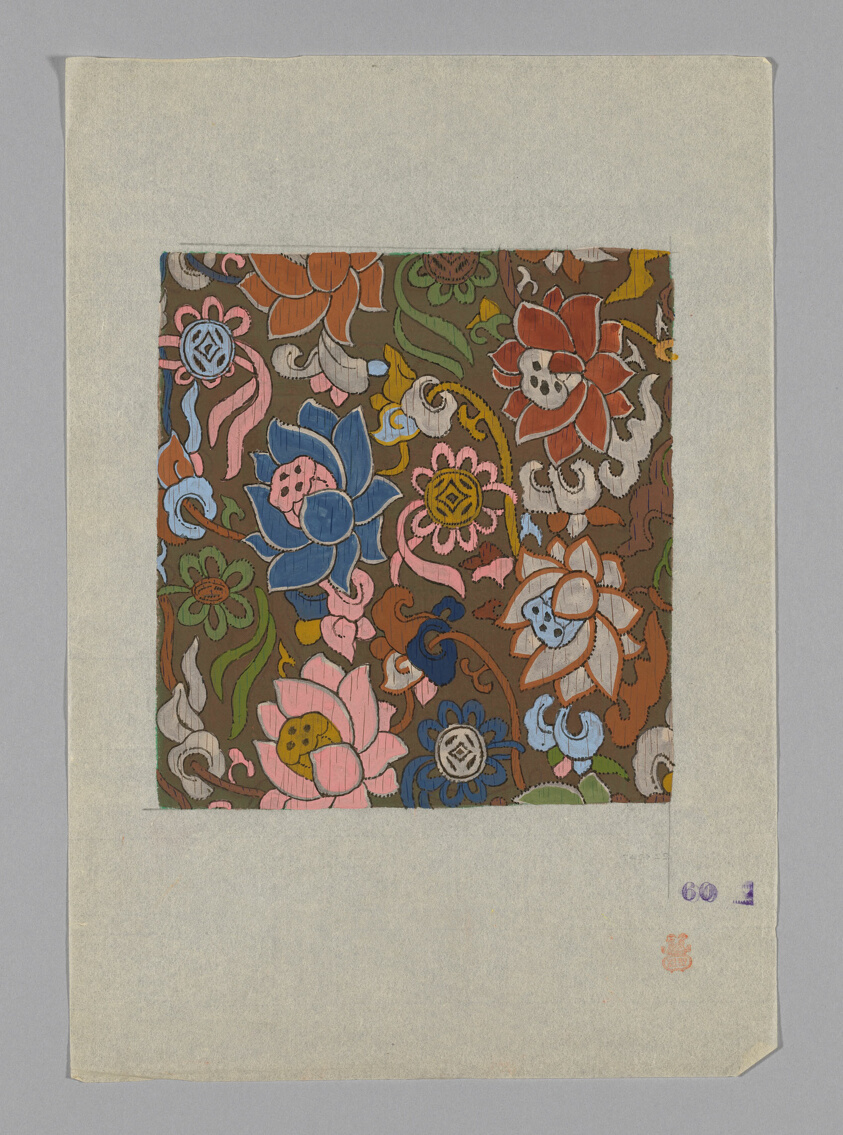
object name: Drawing and Watercolor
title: Design on Paper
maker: Japan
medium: Paper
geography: Japan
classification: textile; accessory - paper design; watercolor; paper